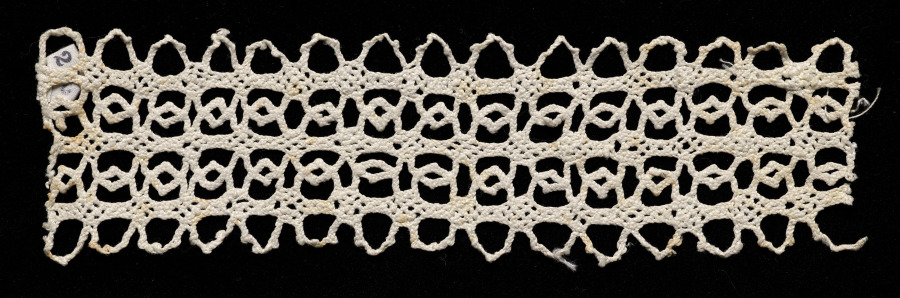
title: Lace Insertion (no selvage)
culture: Italy, Venice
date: 1540–60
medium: Bobbin lace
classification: Lace